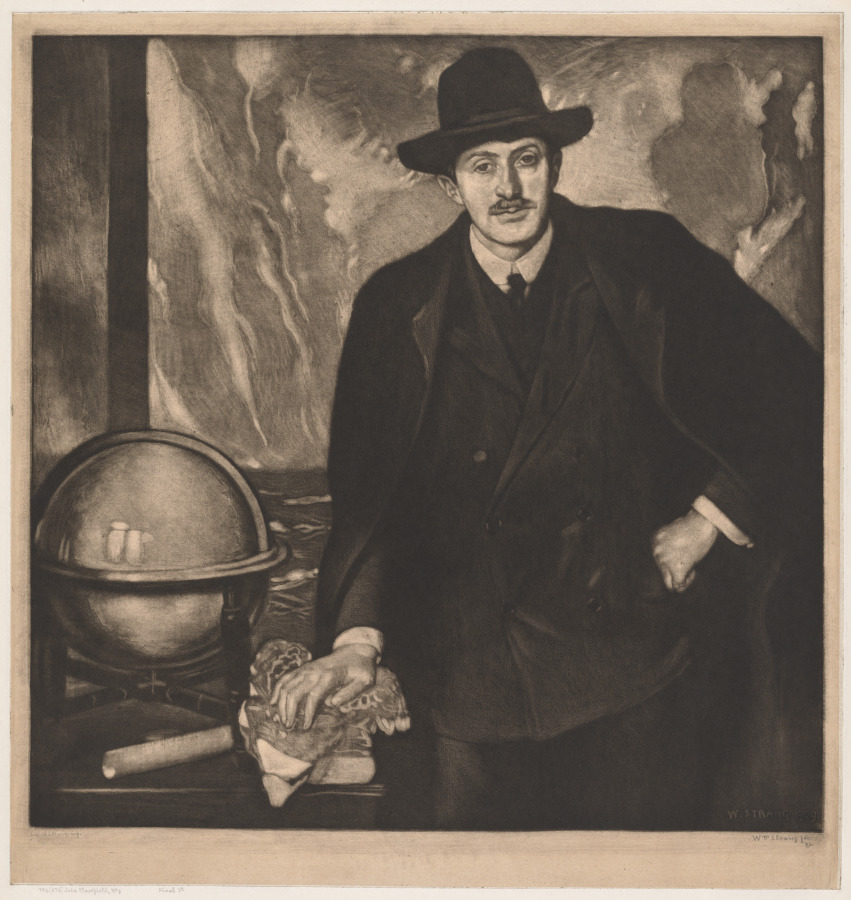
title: John Masefield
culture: England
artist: William Strang (British, 1859–1921)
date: early 1900s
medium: mezzotint and etching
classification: Print